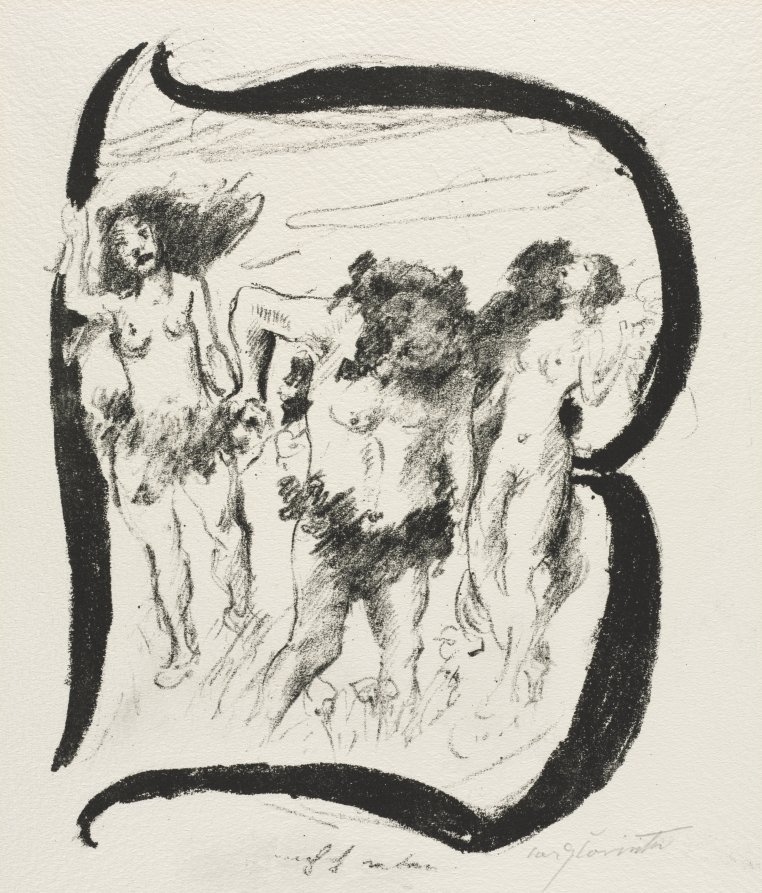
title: Letter B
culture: Germany, 20th century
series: The ABCs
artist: Lovis Corinth (German, 1858–1925)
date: 1916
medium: lithograph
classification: Print